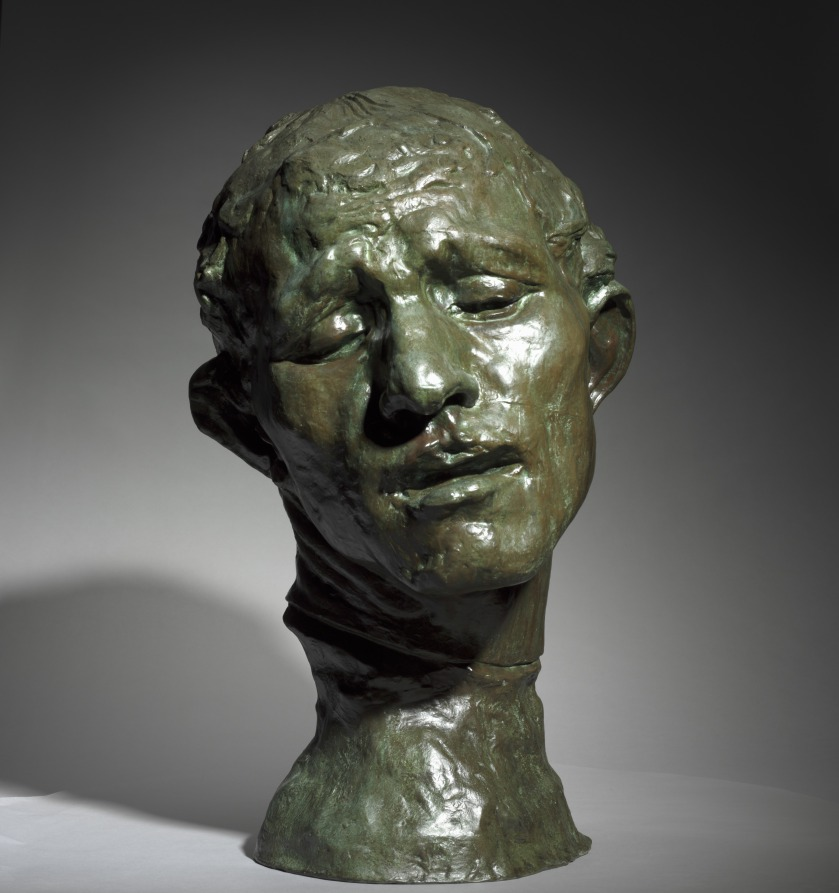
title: Heroic Head of Pierre de Wissant, One of the Burghers of Calais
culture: France, 19th century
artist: Auguste Rodin (French, 1840–1917)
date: 1886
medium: bronze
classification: Sculpture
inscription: inscribed at neck, left: A.Rodin; inscribed lower back: Alexis Rudier/Fondeur-Paris.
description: This sculpture depicts one of the figures in Rodin’s large public monument The Burghers of Calais (1884–89), featuring six French men who volunteered to be taken prisoner by the English in exchange for lifting the siege of Calais during the Hundred Years War (1337–1453). Pierre de Wissant’s anguished expression suggests extreme mental suffering as he contemplates his expected execution. Rodin exhibited a life-size version of the figure as an independent work before completing the monument. He later made multiple versions in various sizes and media.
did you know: This sculpture depicts the head of a figure from Rodin's large public monument The Burghers of Calais (1884-89). The CMA also owns a plaster version of the head.